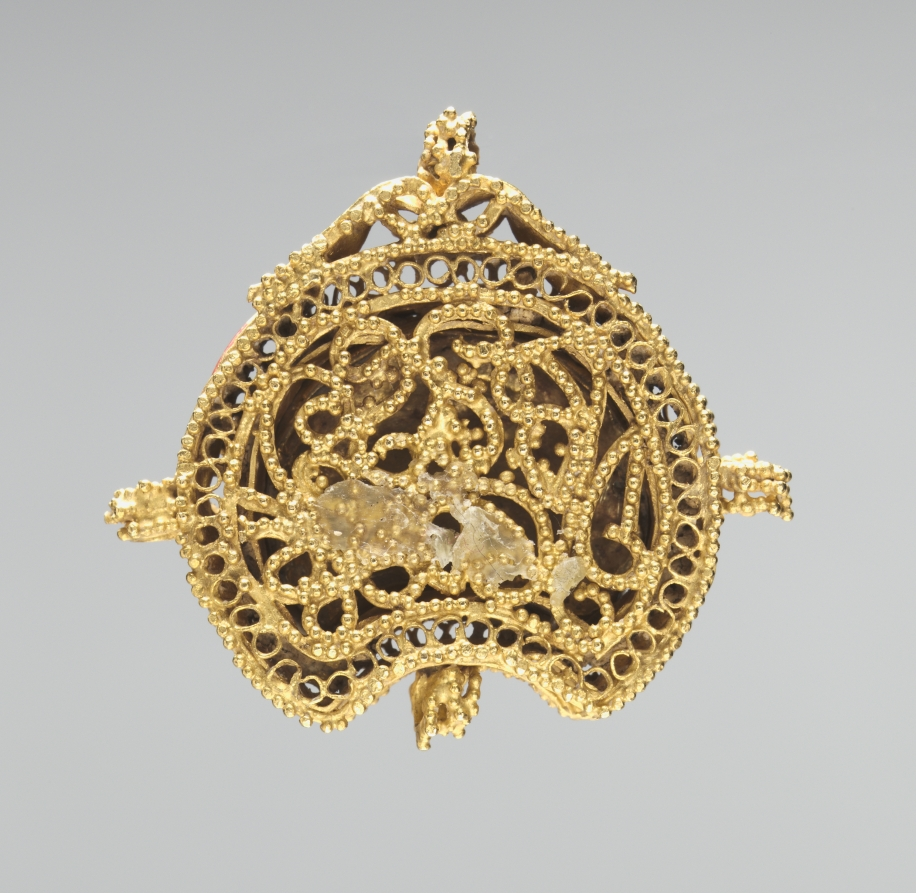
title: Crescent-Shaped Pendant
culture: Byzantium, Constantinople?, Byzantine period, 11th century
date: 1000–1100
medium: gold filigree with cloisonné enamel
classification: Jewelry